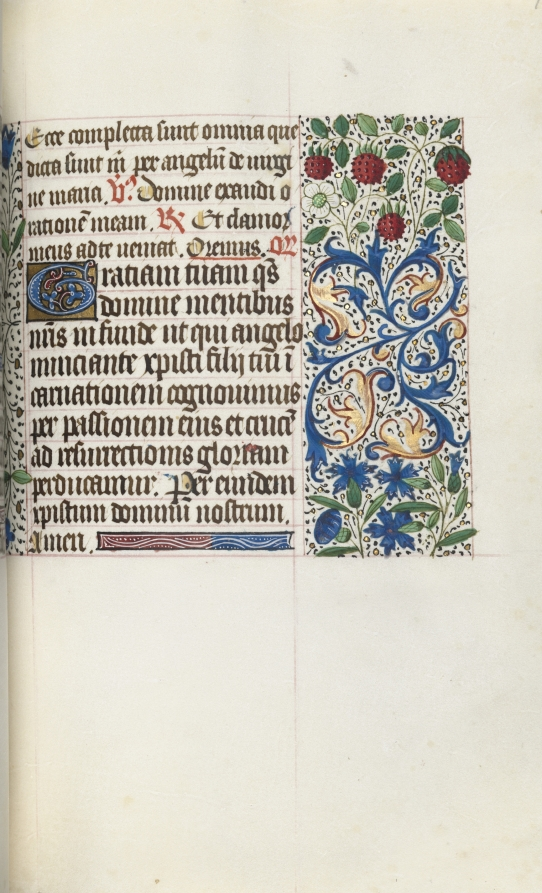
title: Book of Hours (Use of Rouen): fol. 79r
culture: France, Rouen, 15th century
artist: Master of the Geneva Latini (French, active Rouen, 1460–80)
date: c. 1470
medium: ink, tempera, and gold on vellum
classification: Bound Volume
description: In the late 1400s and early 1500s Rouen was an established and important center of book production. The city’s cathedral had a wealthy chapter that spent large sums of money to commission books and to maintain its extensive library. The stationers and booksellers would have likely been concentrated in or near the cathedral precinct. This artist, named after a manuscript now in Geneva, was Rouen’s principal illuminator during the second half of the 1400s.